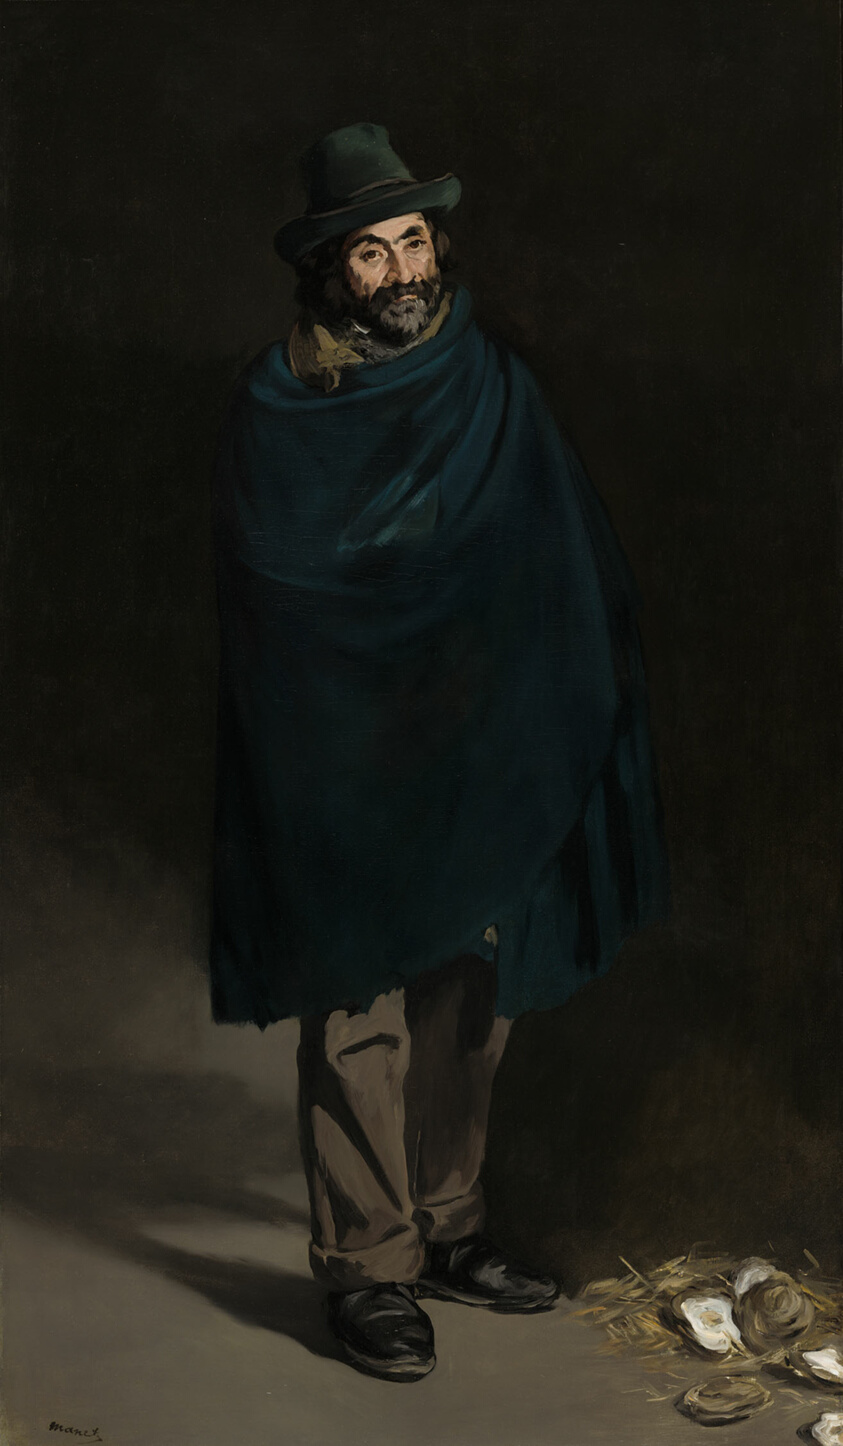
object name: Painting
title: Beggar with Oysters (Philosopher)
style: Realism, 19th century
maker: Édouard Manet (French, 1832–1883)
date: 1865–67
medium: Oil on canvas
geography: France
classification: oil on canvas; painting; paint; european painting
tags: portraits: male subject, peasants, portrait, men, portraits, Century of Progress, world's fairs, Chicago World's Fairs